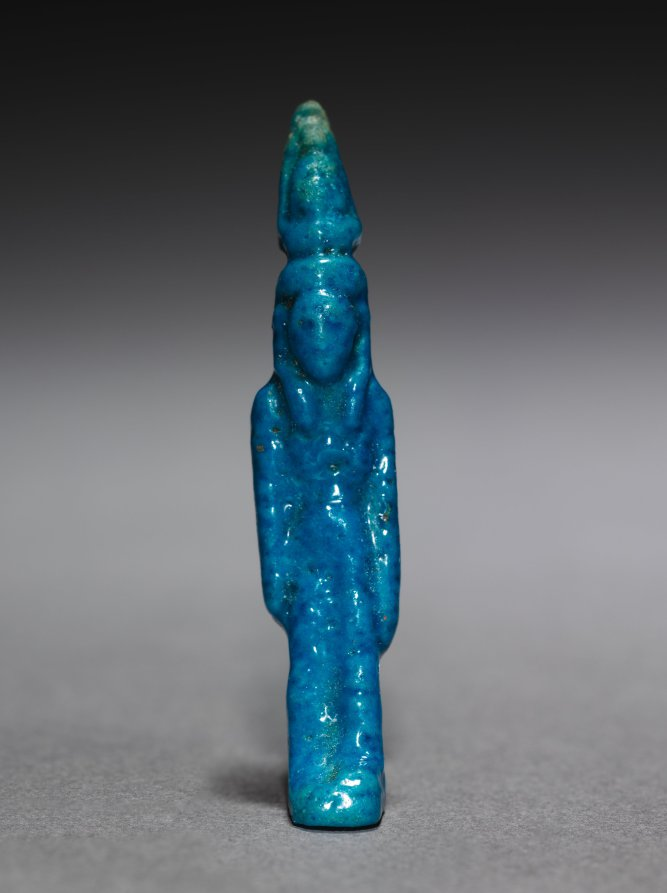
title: Amulet of Mut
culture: Egypt, Third Intermediate (1069–715 BCE)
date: 1069–715 BCE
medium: turquoise faience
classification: Amulets